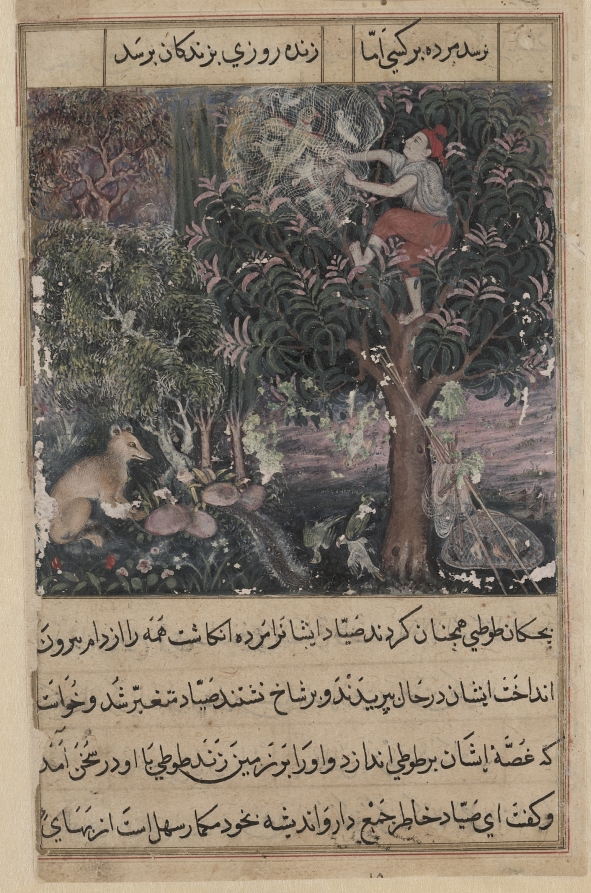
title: The hunter throws away the baby parrots, who pretend to be dead, and captures the mother, from a Tuti-nama (Tales of a Parrot): Fifth Night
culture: Mughal India, court of Akbar (reigned 1556–1605)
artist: attributed to Basavana (Indian, active c. 1560–1600)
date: c. 1560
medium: gum tempera, ink, and gold on paper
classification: Painting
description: Despite the chess-playing monkey’s grim end, the baby parrots continued to cavort with the fox cubs. One day the mother fox discovered that her cubs had been eaten by a panther. Blaming the parrots, she lured a hunter to their tree. The hunter climbed the tree and ensnared the mother parrot and her babies. The mother instructed her young to play dead, then pleaded with the hunter to take her alone, saying that since she knew the art of healing she would fetch a high price. Lush vegetation and a stream of water painted with a soft brush indicate a fresh new stylistic vision that represents a departure from Indian and Persian styles that came before.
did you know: The pink leaves are new shoots that have not yet turned green.